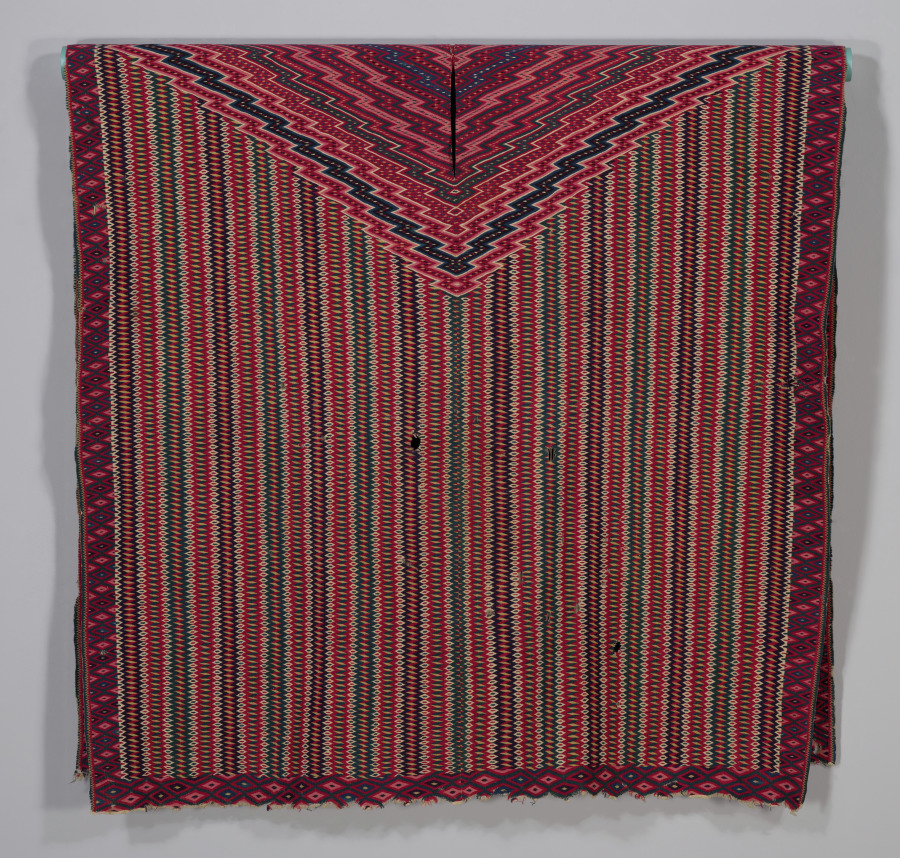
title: Saltillo Sarape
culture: Mexico, Coahuila state, Saltillo Region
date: c. 1820–50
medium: Wool, cotton; tapestry weave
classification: Textile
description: The sarape (wearing blanket) is a classic Mexican men’s garment that became a symbol of national identity and pride after Mexico achieved independence from Spain in 1821. Examples woven between about 1750 and 1875 in Saltillo, a town in northern Mexico, are the sarape’s most famous representatives, prized for their design, color, and technical refinement.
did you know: Saltillo sarapes (wearing blankets) are prized for their design, color, and technical refinement.